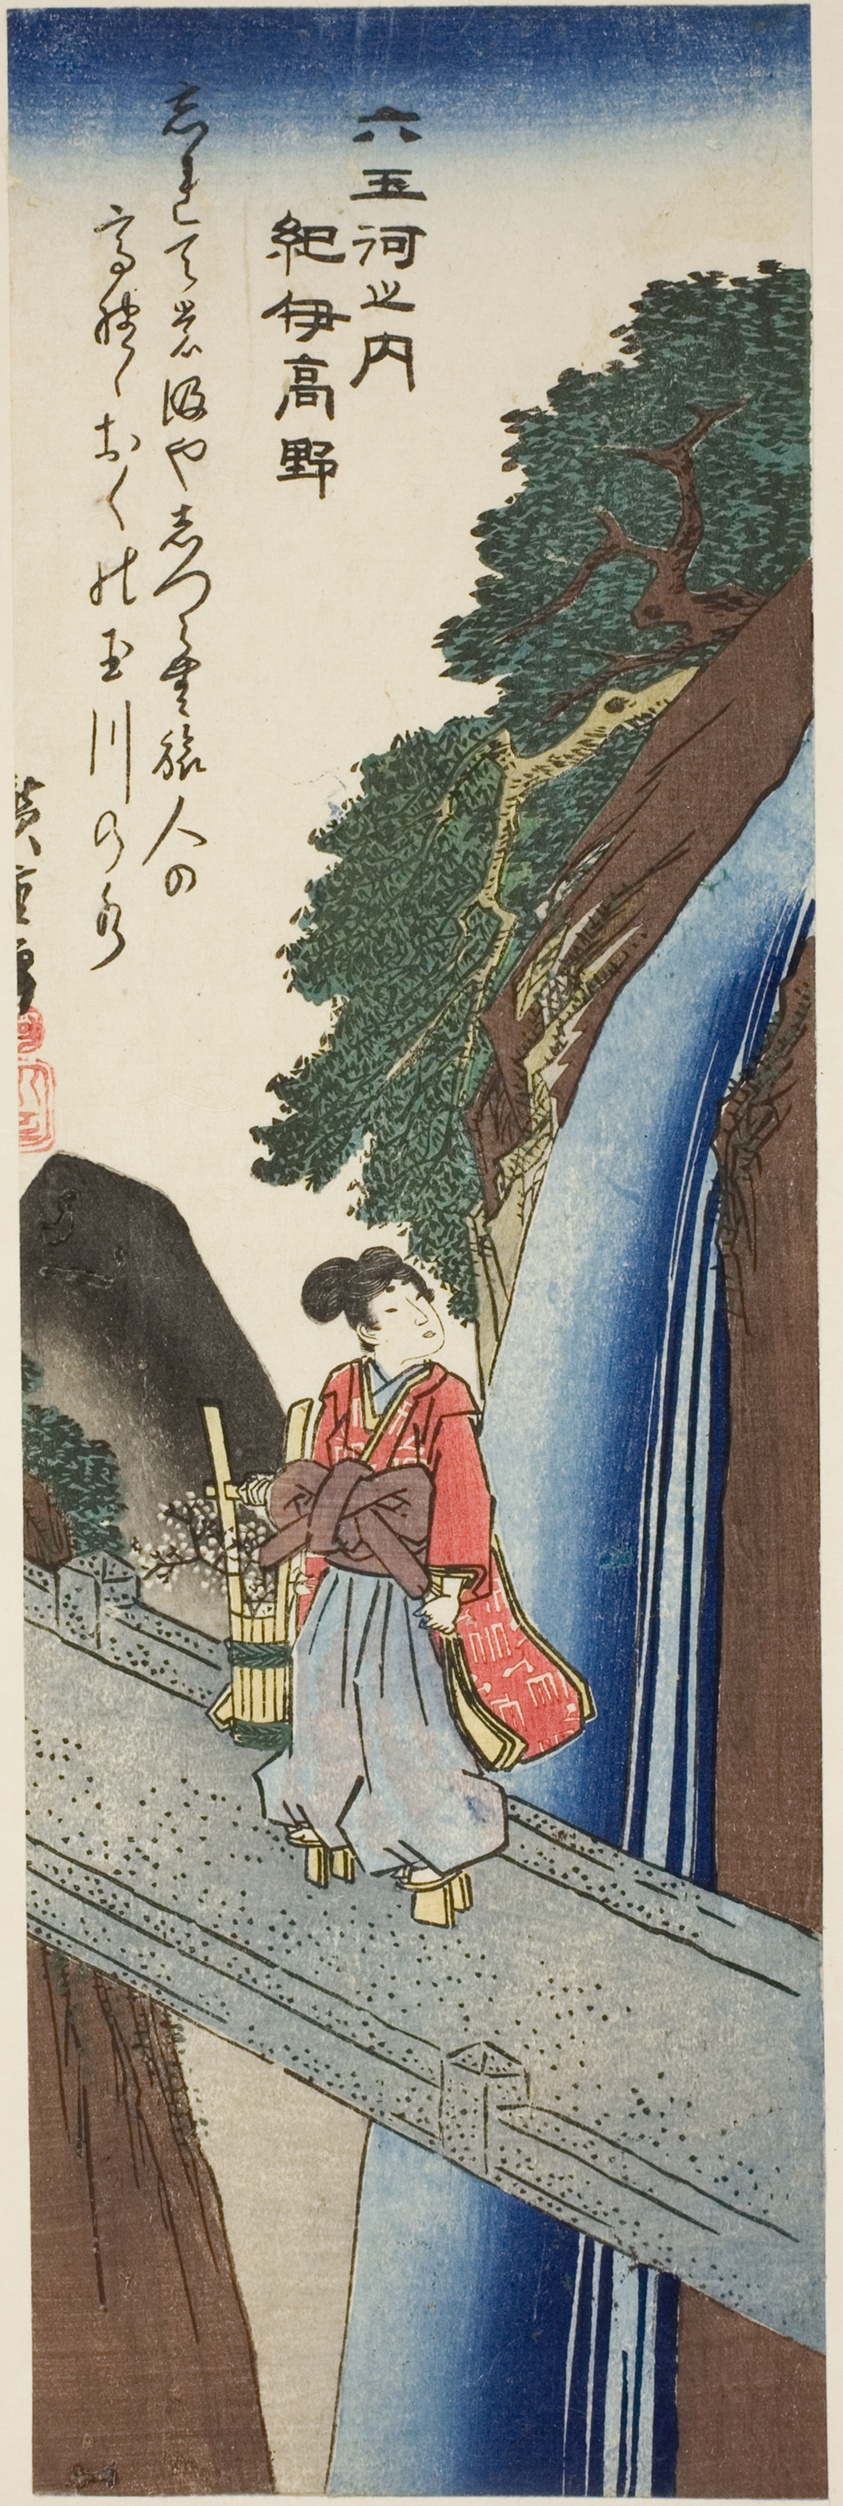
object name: Print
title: Koya Jewel River in Kii Province (Kii Koya), from the series "Six Jewel Rivers (Mu Tamagawa no uchi)"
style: Japanese (culture or style)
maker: Utagawa Hiroshige 歌川 広重; Japanese, 1797-1858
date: c. 1835/39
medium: Color woodblock print; chutanzaku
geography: Japan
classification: print; asian art